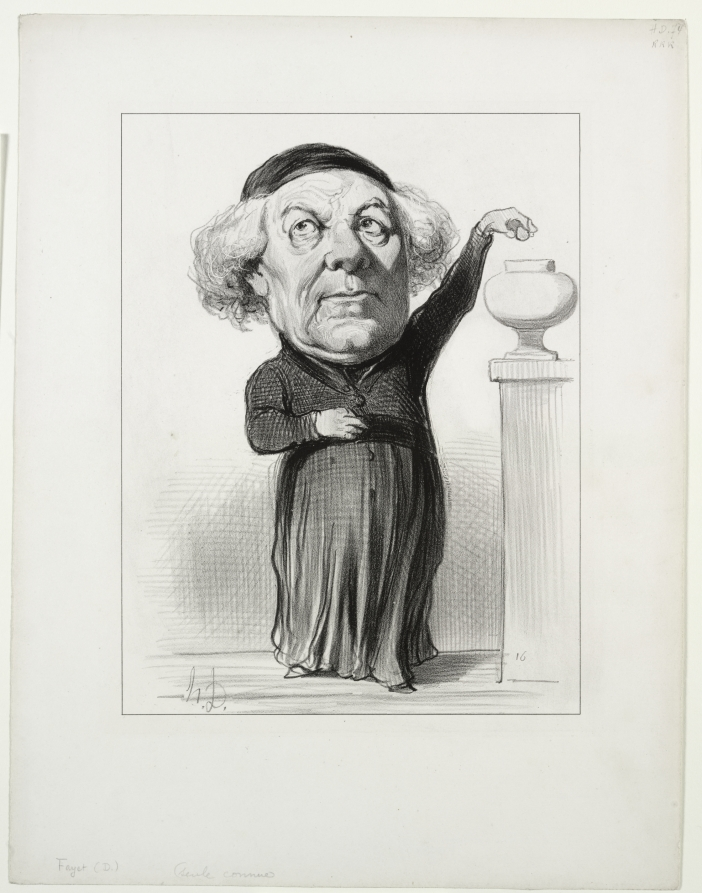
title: Jean Jacques Fayet, Bishop of Orléans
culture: France, 19th century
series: The Representatives Represented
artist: Honoré Daumier (French, 1808–1879)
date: 1849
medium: lithograph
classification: Print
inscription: Upper margin, in pencil: HD. 74 / RRR ; lower margin, in pencil: Fayet (D.) (seule connue) ; verso, in pencil: n 06-c / Fayet (J.J.) / Évêque d'Orleans / né'à membre le 26 juillet 1786 ; museum stamp ; black stamp: bliss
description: This rare print was intended for the series The Representatives Represented but was never published.